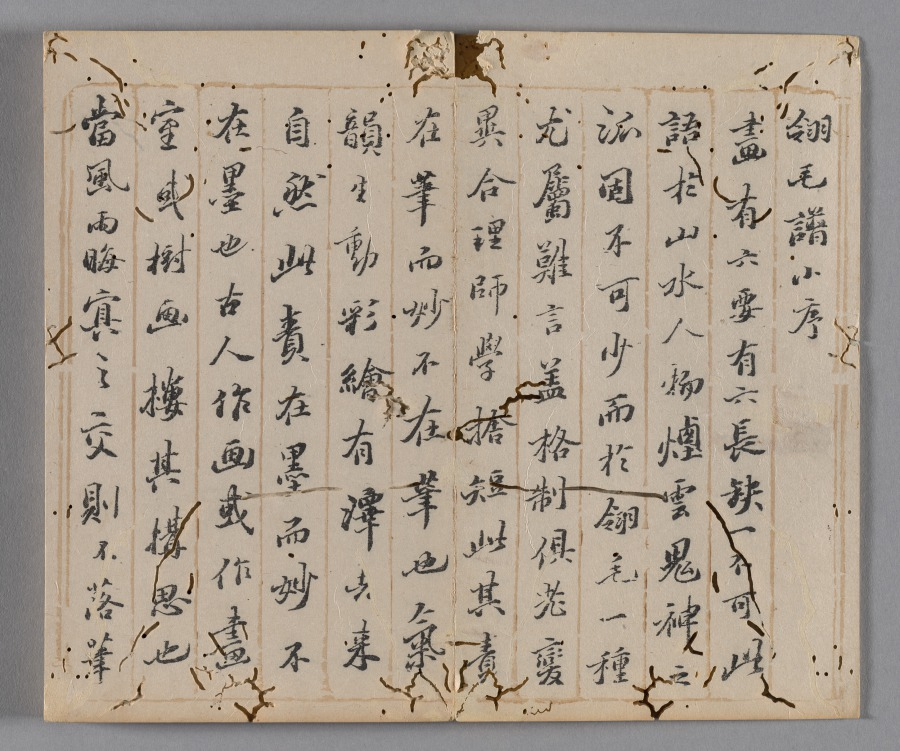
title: Ten Bamboo Studio Painting and Calligraphy Handbook (Shizhuzhai shuhua pu): Birds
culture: China, Qing dynasty (1644-1911)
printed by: Hu Zhengyan (Chinese, c. 1584–1674)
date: 1633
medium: Woodblock-printed book; ink and colors on paper; first edition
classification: Print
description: Color printing reached a level of perfection in the early 1600s, as seen in this Ten Bamboo Studio Collection of Calligraphy and Painting and the Mustard Seed Garden Manual of Painting (printed 1679 and 1701). The painterly quality, precision in registering (aligning) the woodblocks, and harmonious colors made them the most successful color print editions in Chinese history. Both editions were printed and compiled in Nanjing, spread nationwide, and had a great impact on the arts in Japan and Korea.